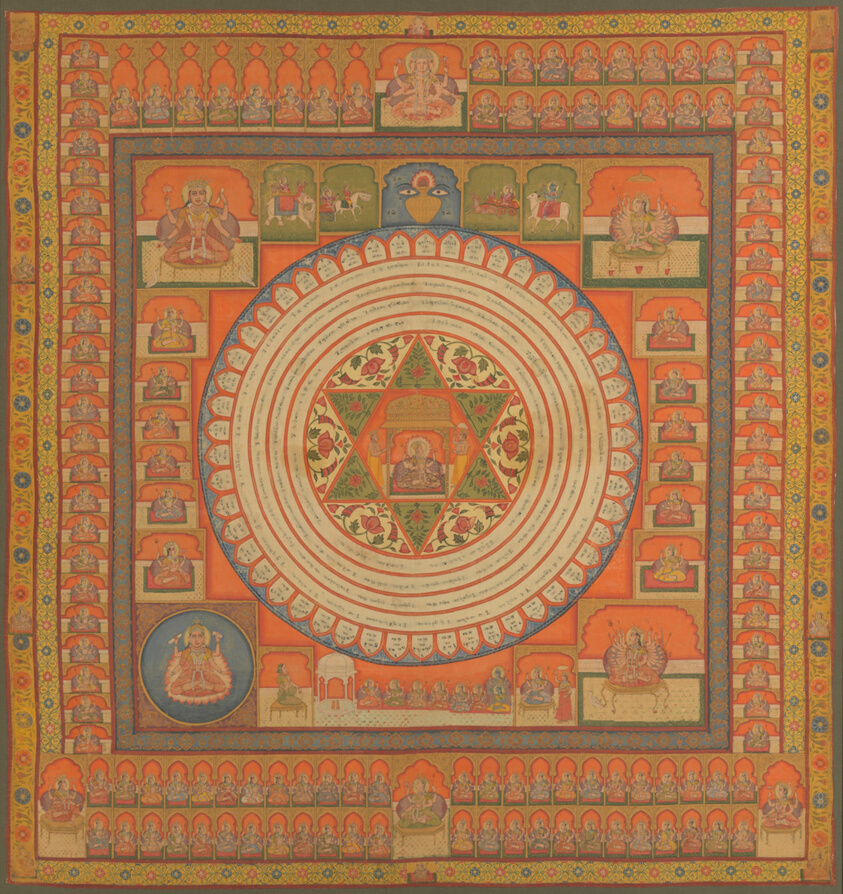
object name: Painting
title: Mystical Diagram (Yantra)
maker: India; Rajasthan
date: 19th century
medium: Opaque watercolor on cloth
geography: Rajasthan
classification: watercolor; painting; asian art